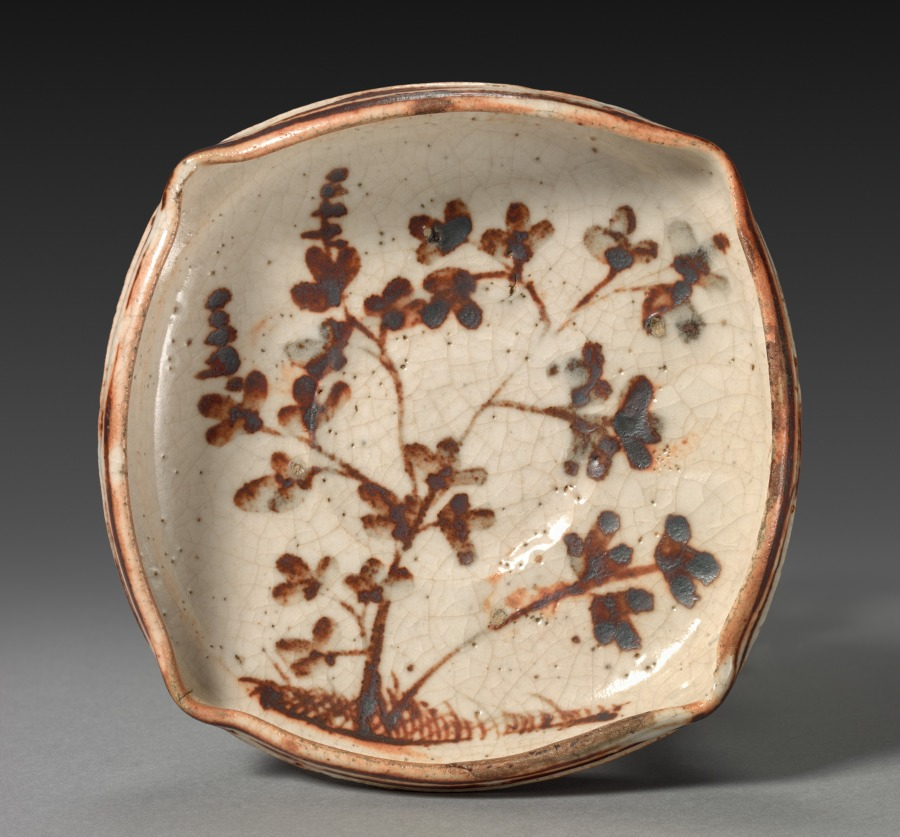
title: Dish with Design of Plum Trees: Shino Ware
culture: Japan, Momoyama period (1573–1615)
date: late 1500s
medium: stoneware with underglaze iron slip decoration (Mino ware)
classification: Ceramic